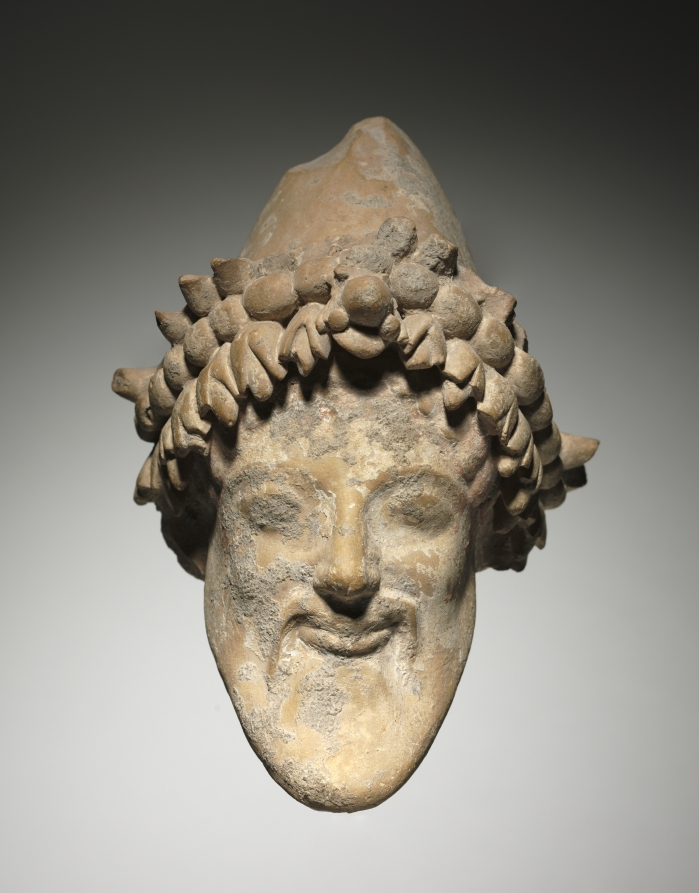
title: Head of Bearded Banqueter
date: 525–500 BCE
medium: terracotta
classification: Sculpture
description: This terracotta head of a man features wide, almond-shaped eyes and a serene smile beneath a long mustache. The man has a long beard and wears a wreath with leaves protruding above and below a string of fruit or beads. His head is covered by a pointed cap. This fragment probably belonged to a figure of a banqueter, or perhaps even Dionysos, the god of wine.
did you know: Wreaths were often worn during Greek symposia (banquets).